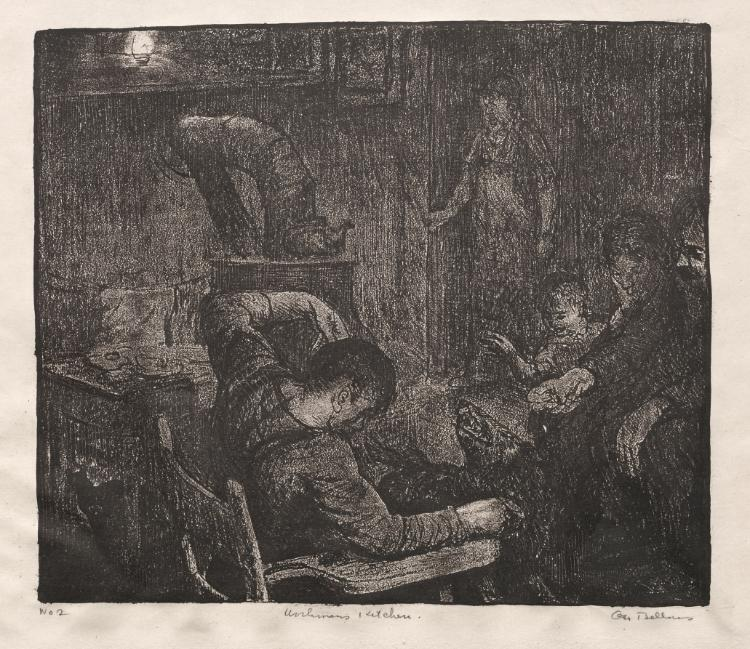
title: Workman's Kitchen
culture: America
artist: George Bellows (American, 1882–1925)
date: 1917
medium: lithograph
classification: Print